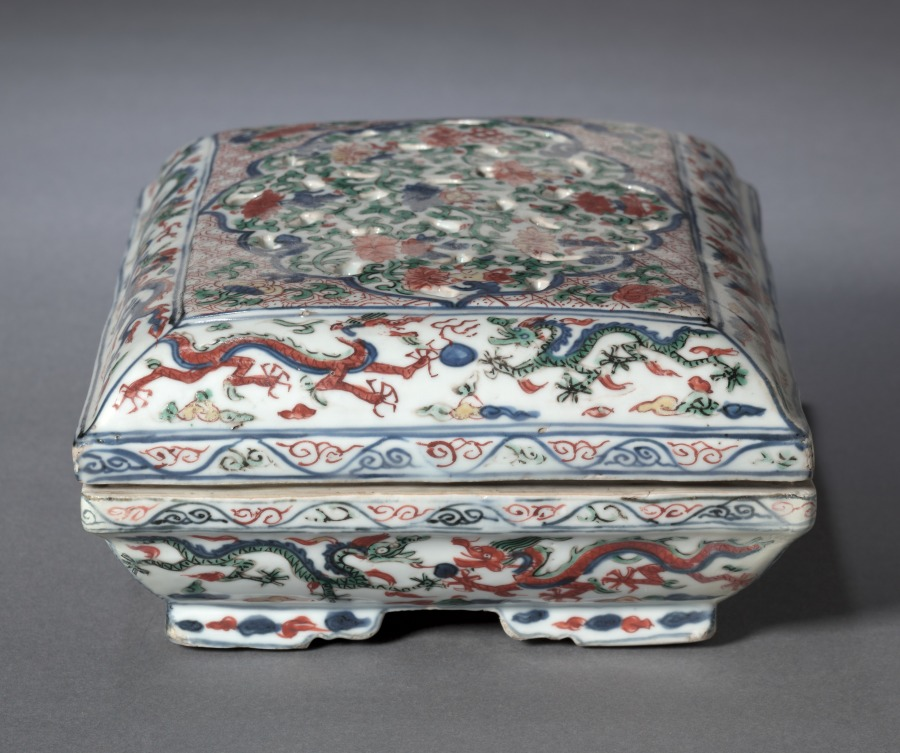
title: Box with Cover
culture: China, Jiangxi province, Jingdezhen kilns, Ming dynasty (1368-1644), Wanli reign (1572-1620)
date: 1573–1620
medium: porcelain with wucai (five color) overglaze enamel decoration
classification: Ceramic